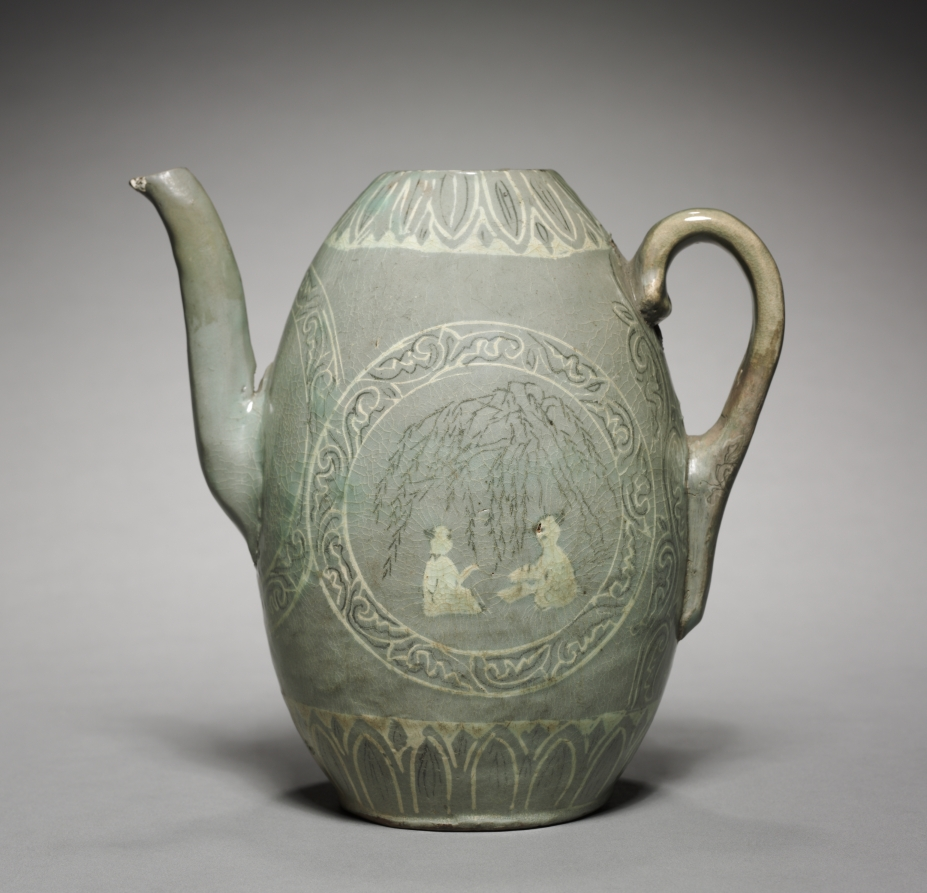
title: Pitcher with Inlaid Figure and Willow Design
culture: Korea, Goryeo dynasty (918–1392)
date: 1200s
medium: celadon ware with inlaid white and black slip decoration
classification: Ceramic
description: Representations of the elite’s elegant gatherings also appear on craft art designs, particularly depictions of the four accomplishments celebrated as cultivated pastimes by the scholar-literati elite—that is, playing stringed instruments and chess, and practicing calligraphy and painting. The image on this rare Korean inlaid celadon of two figures sitting together under a tree is comparable to renderings featuring the accomplishment motif of playing chess, or baduk in Korean.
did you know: As one of the oldest board games invented in China, this East Asian chess is still played in international competition venues.